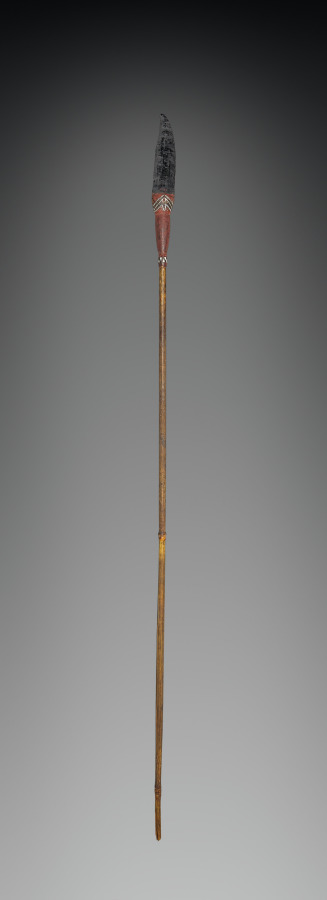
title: Spear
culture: South Sea Islands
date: before 1922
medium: metal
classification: Arms and Armor